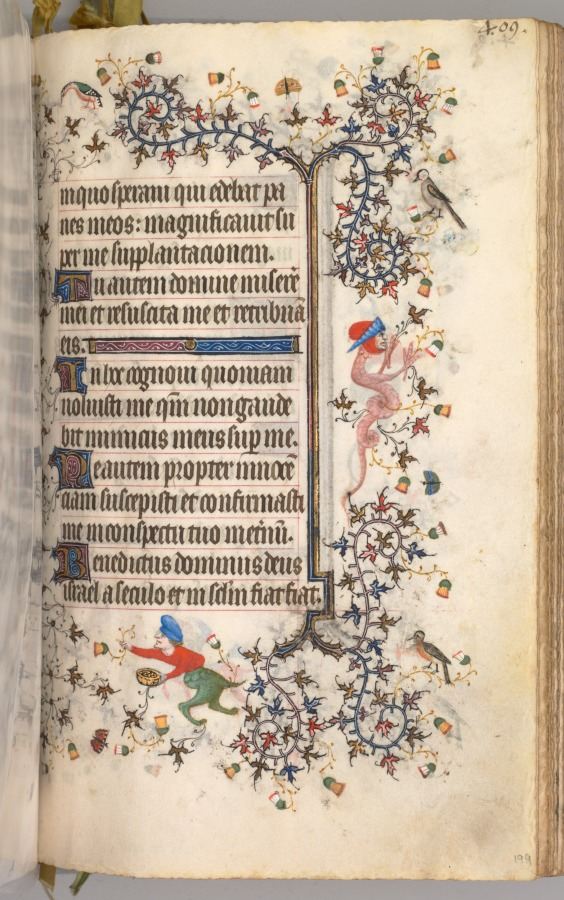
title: Hours of Charles the Noble, King of Navarre (1361-1425): fol. 199r, Text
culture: France, Paris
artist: Master of the Brussels Initials and Associates (French)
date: c. 1405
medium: ink, tempera, and gold on vellum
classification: Bound Volume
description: This precious volume was obviously highly prized by its owner, the French-born King of Navarre, who had his coat of arms painted on no less than twenty folios. Rather than directly commissioning this manuscript from a specific workshop, it seems that Charles the Noble acquired his book of hours -- perhaps ready-made for the luxury market -- while on a trip to Paris in 1404-05. A collaborative effort, six painting styles are evidenced within the pages of this codex, those of two Italians, two Frenchmen, and two Netherlanders. The painter who was responsible for the planning and decoration of the book, and who produced seventeen of the large miniatures, was a Bolognese artist known as the Master of the Brussels Initials. His principal assistant, responsible for most of the borders, was a Florentine who signed his name "Zecho" da Firenze on folio 208 verso.